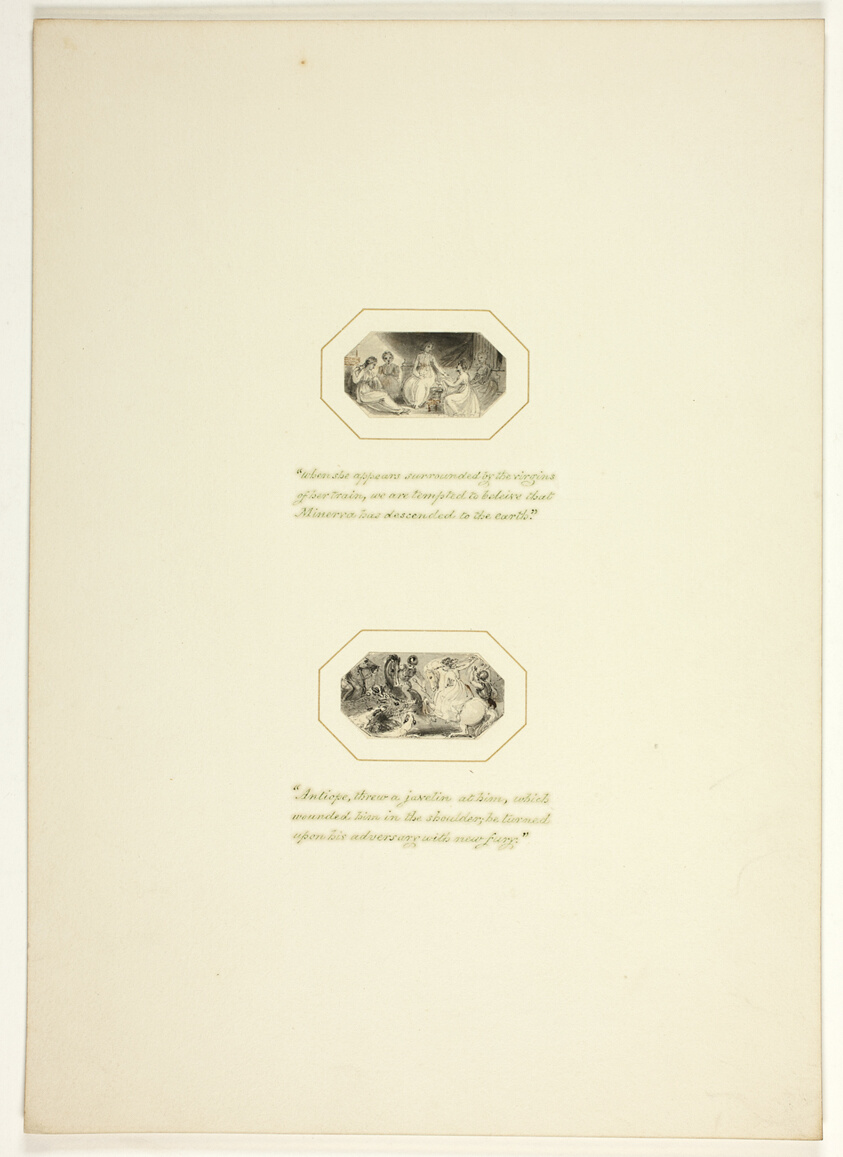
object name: Drawing and Watercolor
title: Study for a plate from Telemachus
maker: Thomas Stothard (English, 1755-1834)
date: c. 1797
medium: Ink wash on paper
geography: England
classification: ink or chalk wash; drawings (visual works); prints and drawing